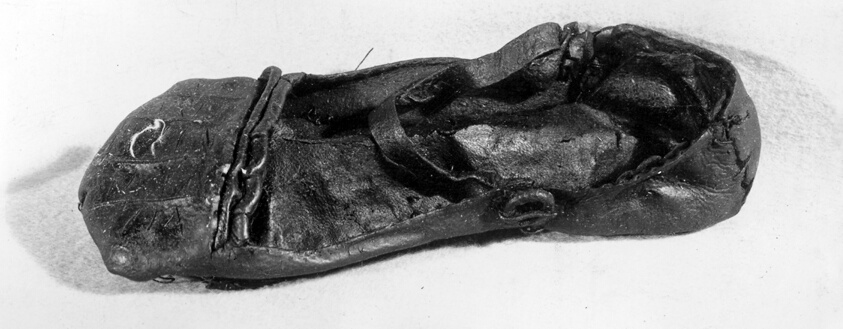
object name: Costume and Accessories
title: Woman's Horned Toe Shoe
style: tudor, european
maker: England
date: 16th century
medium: Leather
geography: England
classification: textile; costume accessory - shoe; shoes - misc; costume; dress (garment); clothing